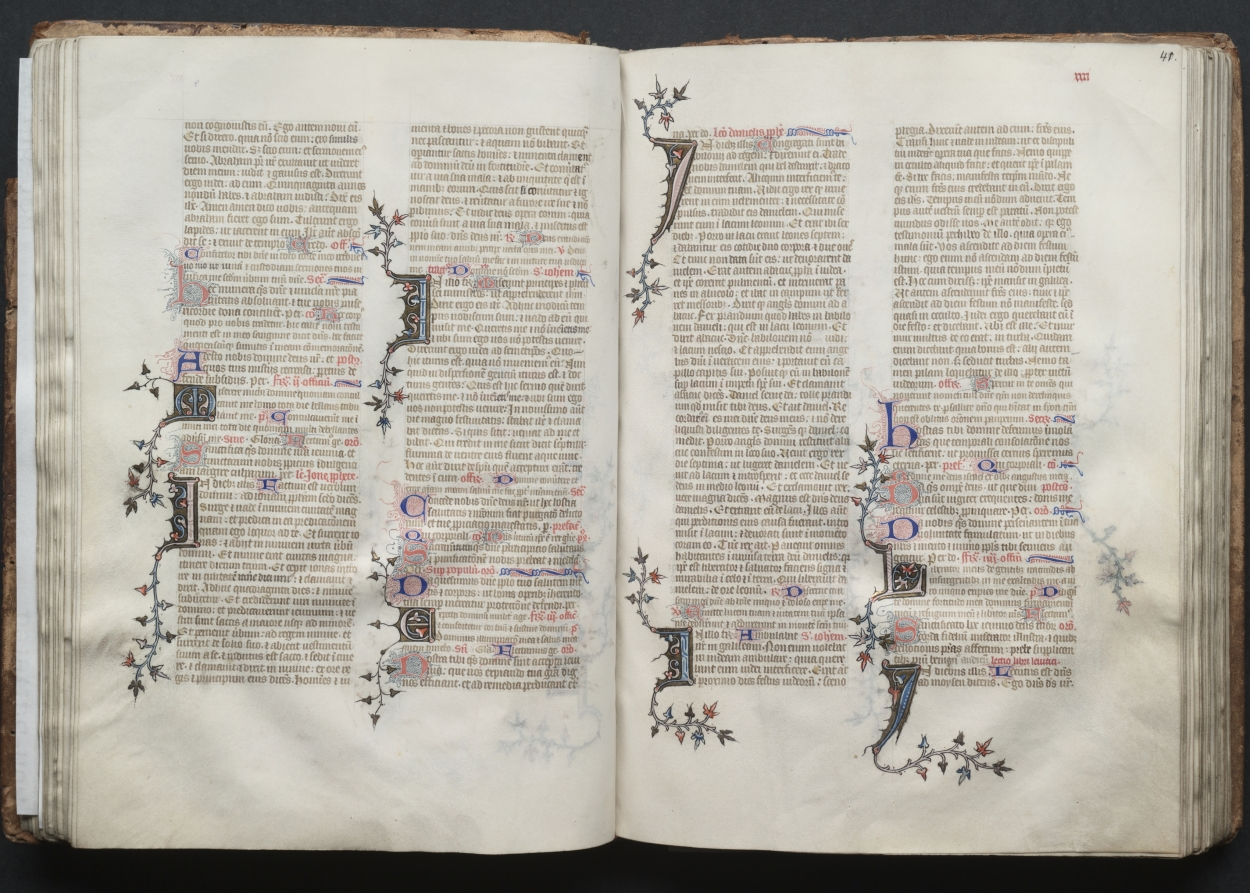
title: The Gotha Missal: Fol. 41r, Text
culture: France, Paris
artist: Master of the Boqueteaux (French)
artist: and Workshop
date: c. 1375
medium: ink, tempera, and gold on vellum; blind-tooled leather binding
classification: Bound Volume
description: The style and quality of this manuscript's decoration is typical of deluxe Parisian books made for aristocratic or royal patrons. Most of the book's decoration appears to be the work of the Master of the Boqueteaux, an artist active at the court of King Charles V (died 1380). His style was apparently shared by a number of book illuminators working in and around Paris. It is very possible that the Gotha Missal belonged to Charles V, but is not provable because the manuscript has no royal portraits and lacks a colophon. Given the book's magnificent decoration, however, it would seem that it was produced for a Valois prince, if not for the king himself. The manuscript receives its name from the German dukes of Gotha, its later owners.